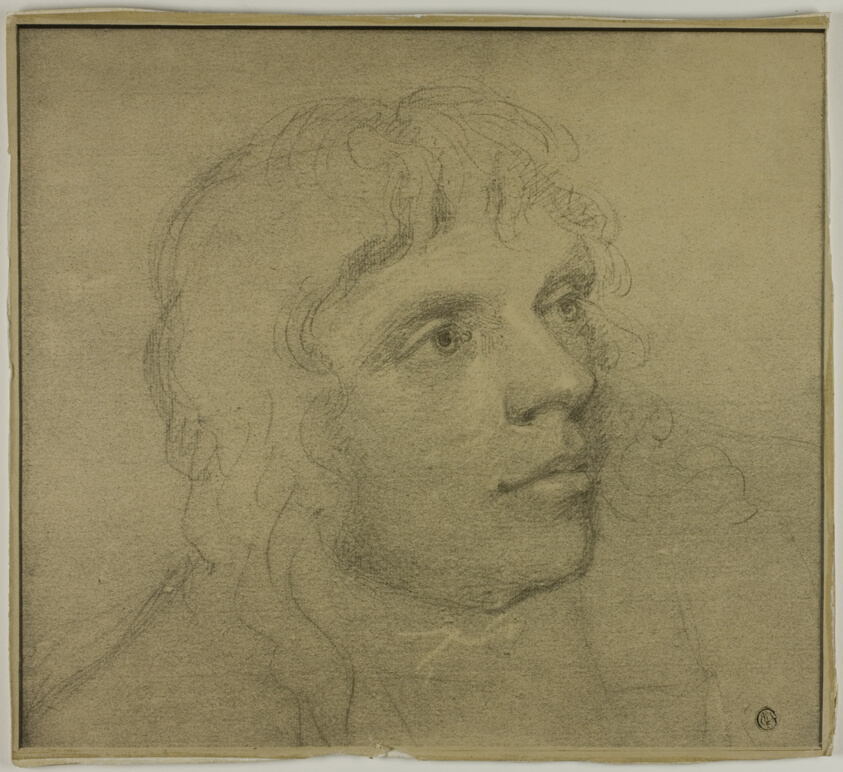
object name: Drawing and Watercolor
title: John Flaxman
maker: Possibly after Ozias Humphry; English, 1742-1810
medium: Graphite, with black chalk, on tan wove paper, laid down on ivory board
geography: England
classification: graphite; drawings (visual works); prints and drawing